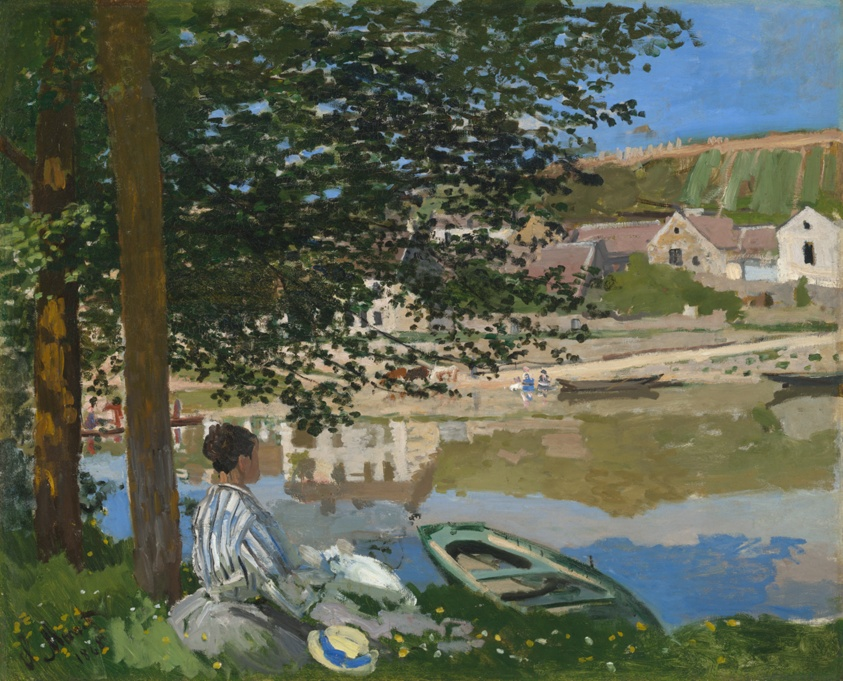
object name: Painting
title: On the Bank of the Seine, Bennecourt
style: Impressionism, nineteenth century, 19th century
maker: Claude Monet (French, 1840–1926)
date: 1868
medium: Oil on canvas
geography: France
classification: painting; french; oil paintings (visual works); oil on canvas; paint; european painting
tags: landscapes, trees, reflections, house, hills, France, flowers, figures, building, boats, weather/seasons, leisure, women, families, water, Century of Progress, world's fairs, Chicago World's Fairs